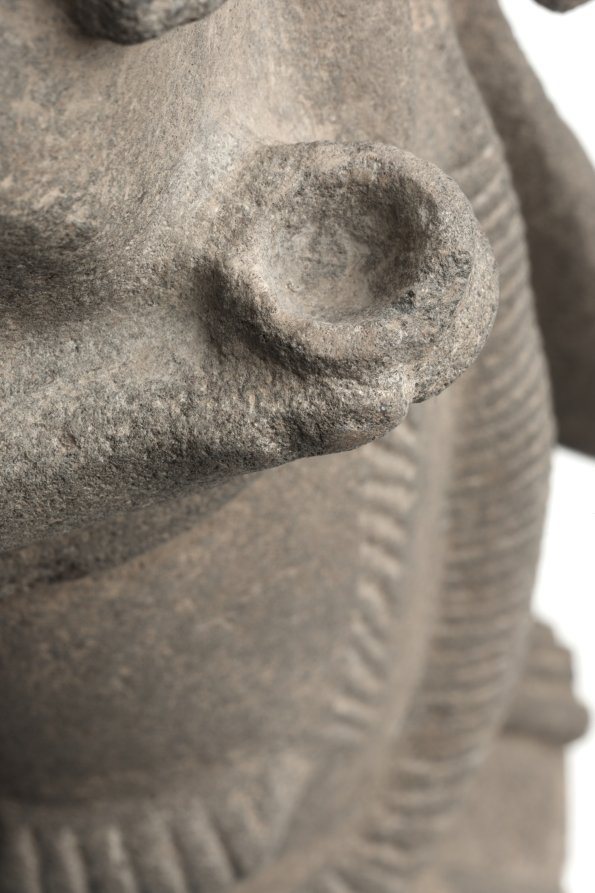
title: Priest-King or Deity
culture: Hittite, North Syria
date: c. 1600 BCE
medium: basalt with bone eyes (left, ancient; right, restored)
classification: Sculpture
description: The Hittites migrated into Anatolia in the 3rd millennium BCE and spoke an Indo-European language, a group that includes Greek, Latin, Persian, Sanskrit, English, and most modern European languages. They were the first ancient people to use iron for weapons. From about 1600–1200 BCE their empire was at its peak, extending from central Anatolia to Syria, and south along the eastern Mediterranean. Their vast empire and interest in commerce enabled the Hittites to spread Mesopotamian ideas and culture throughout the ancient Mediterranean world. This large basalt sculpture is exceptionally rare in depicting a Hittite god or priest-king wearing a horned conical crown, false beard, and long robe. He holds a bowl in his right hand and once held something in his left, perhaps a staff or sword.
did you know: The left eye of the sculpture is the original bone inlay while the right eye is a modern restoration done after the piece was damaged.